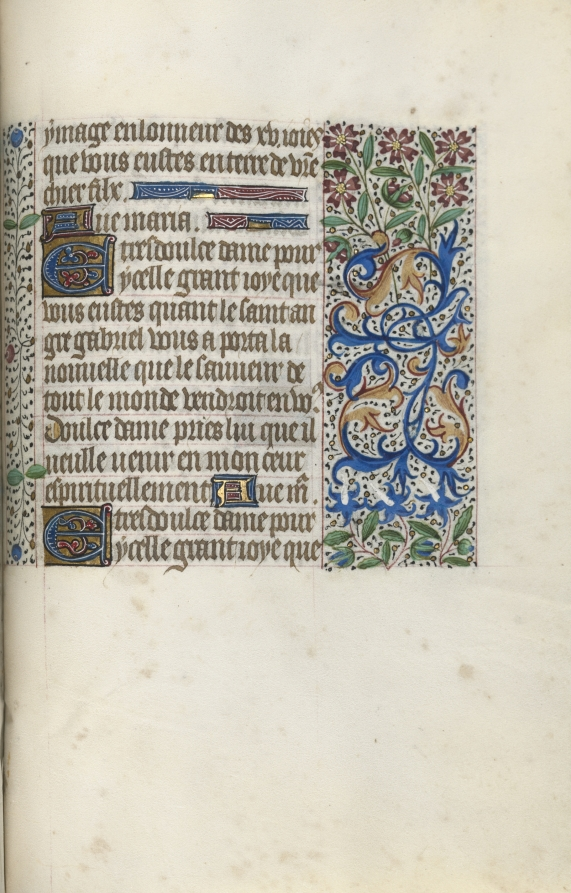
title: Book of Hours (Use of Rouen): fol. 147r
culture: France, Rouen, 15th century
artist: Master of the Geneva Latini (French, active Rouen, 1460–80)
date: c. 1470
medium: ink, tempera, and gold on vellum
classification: Bound Volume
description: In the late 1400s and early 1500s Rouen was an established and important center of book production. The city’s cathedral had a wealthy chapter that spent large sums of money to commission books and to maintain its extensive library. The stationers and booksellers would have likely been concentrated in or near the cathedral precinct. This artist, named after a manuscript now in Geneva, was Rouen’s principal illuminator during the second half of the 1400s.